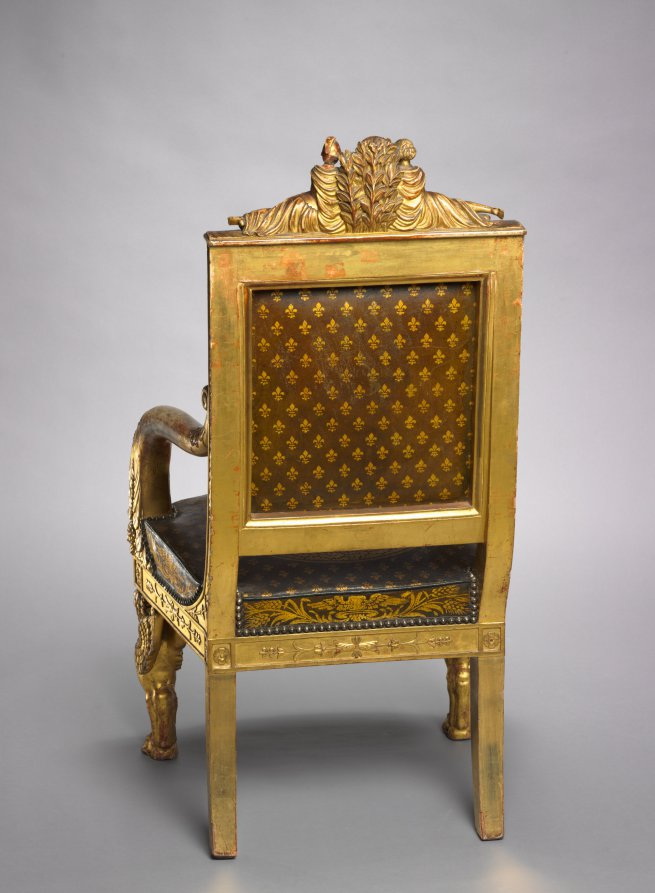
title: Child's Throne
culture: France, Paris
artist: Pierre-Marie Balny le Jeune (French, 1832)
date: 1822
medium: carved and gilded wood, leather upholstery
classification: Furniture and woodwork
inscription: inscribed with stencils inside back rail: BLONDEL TAPISSIER/RUE ST. ANTOINE N 72 1822 inscribed in ink lower edge back rail: 12 JANVIER 18[22?]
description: This chair was made for the young, presumed successor to the French throne who ruled briefly as Henri V in 1830, the last of the direct Bourbon line. He is depicted at the center of the top rail protected by female figures representing France and Minerva, the Roman goddess of wisdom. Fleurs-de-lis and the Gallic rooster, symbols of French royalty and the French people, decorate the upholstery.